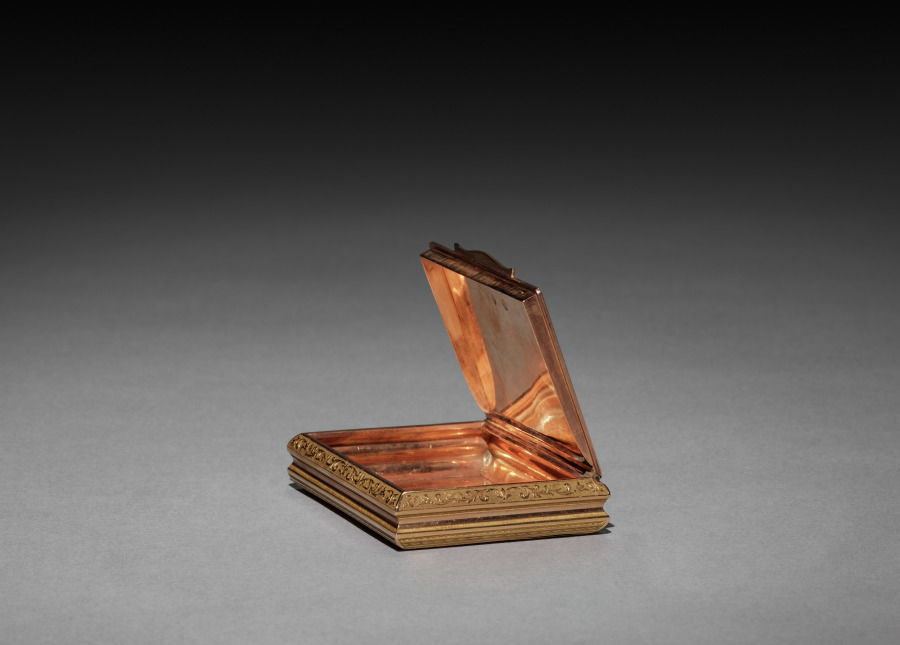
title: Snuff Box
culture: Switzerland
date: c. 1825–1850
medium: gold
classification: Miscellaneous